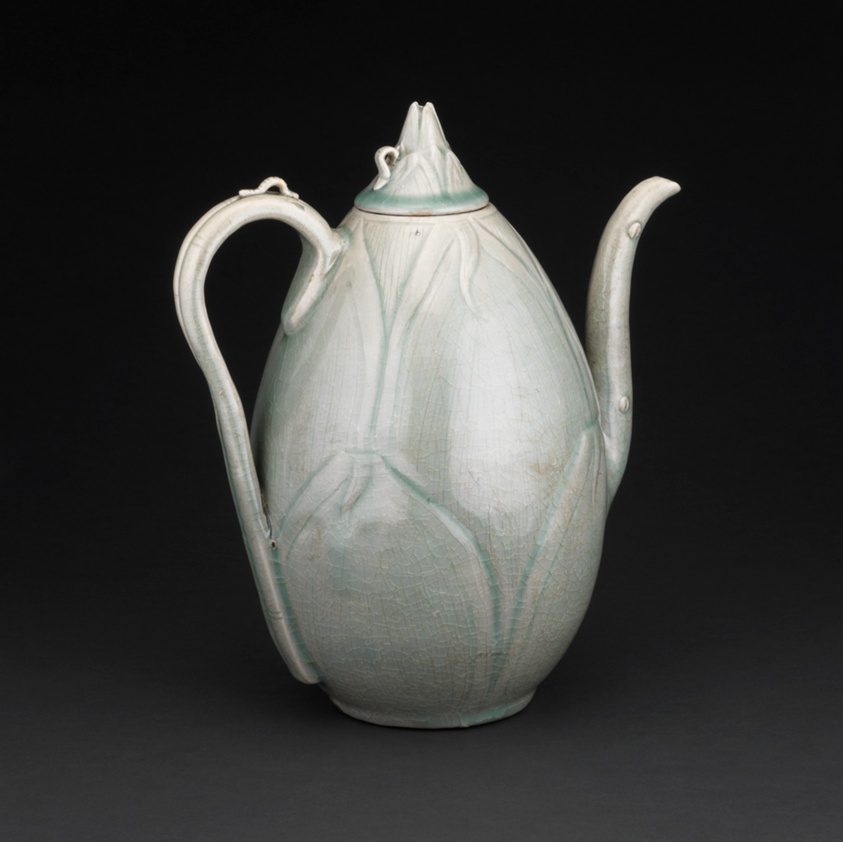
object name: Vessel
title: Bamboo Shoot-Shaped Ewer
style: Korean (culture or style)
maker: Korea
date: Goryeo dynasty (918–1392), 12th century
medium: Stoneware with celadon glaze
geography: Korea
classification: ewer (vessel); stoneware; vessel; asian art; ceramics